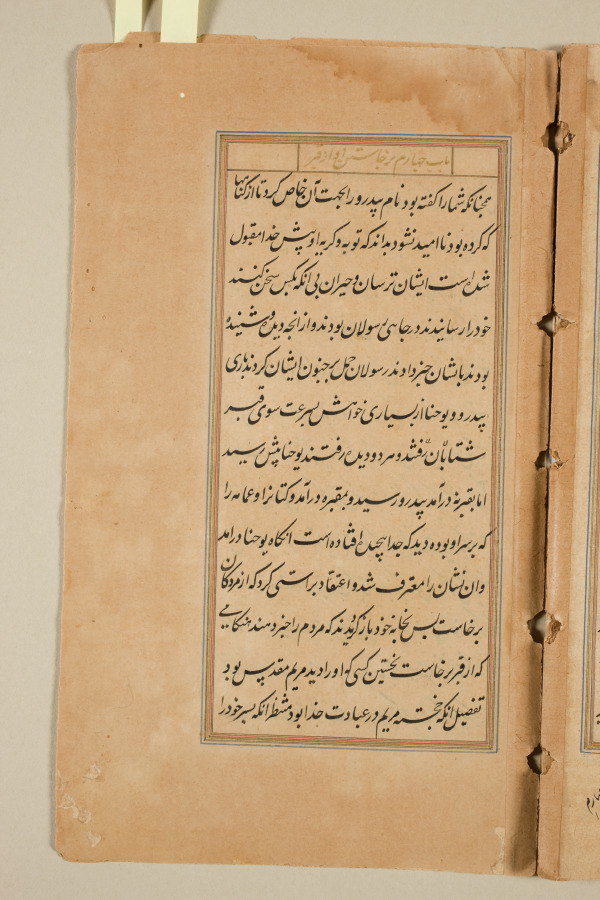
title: Text page from a Mirror of Holiness (Mir’at al-quds) of Father Jerome Xavier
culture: Mughal India, Allahabad, made for Prince Salim (1569–1627)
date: 1602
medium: Ink and gold on paper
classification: Manuscript